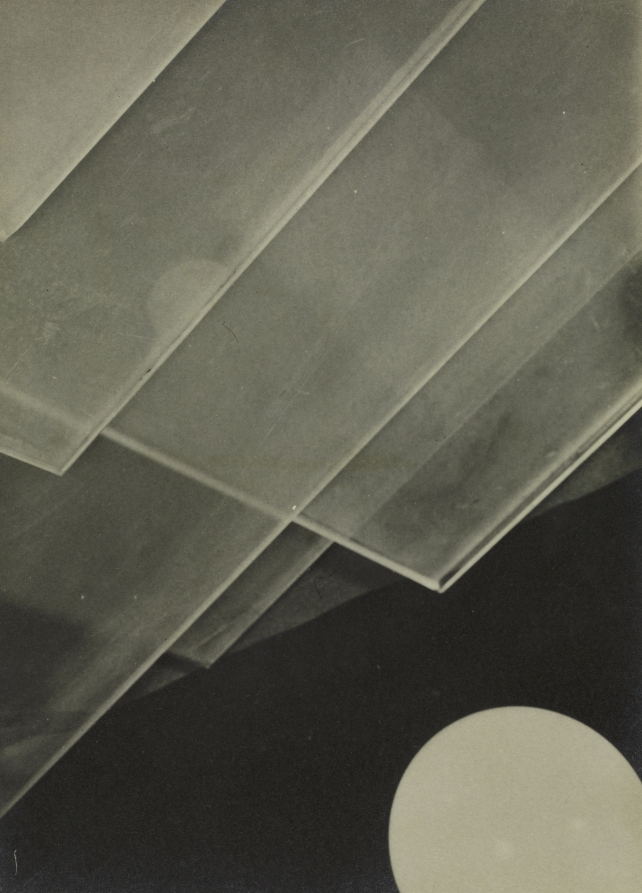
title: Composition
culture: Czechoslovakia, 20th century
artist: Jaromír Funke (Czech, 1896–1945)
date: 1927–1929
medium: gelatin silver print, silver bromide, photogram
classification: Photograph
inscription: Written in pencil on verso: "oben [up arrow]"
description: Active during the 1920s and 1930s, Jaromír Funke was one of Czechoslovakia's most important photographers. During the late 1920s, Funke used panes and spheres of glass, bottles, and other objects to create striking abstract compositions and still lifes that emphasized reflected light and cast shadows.